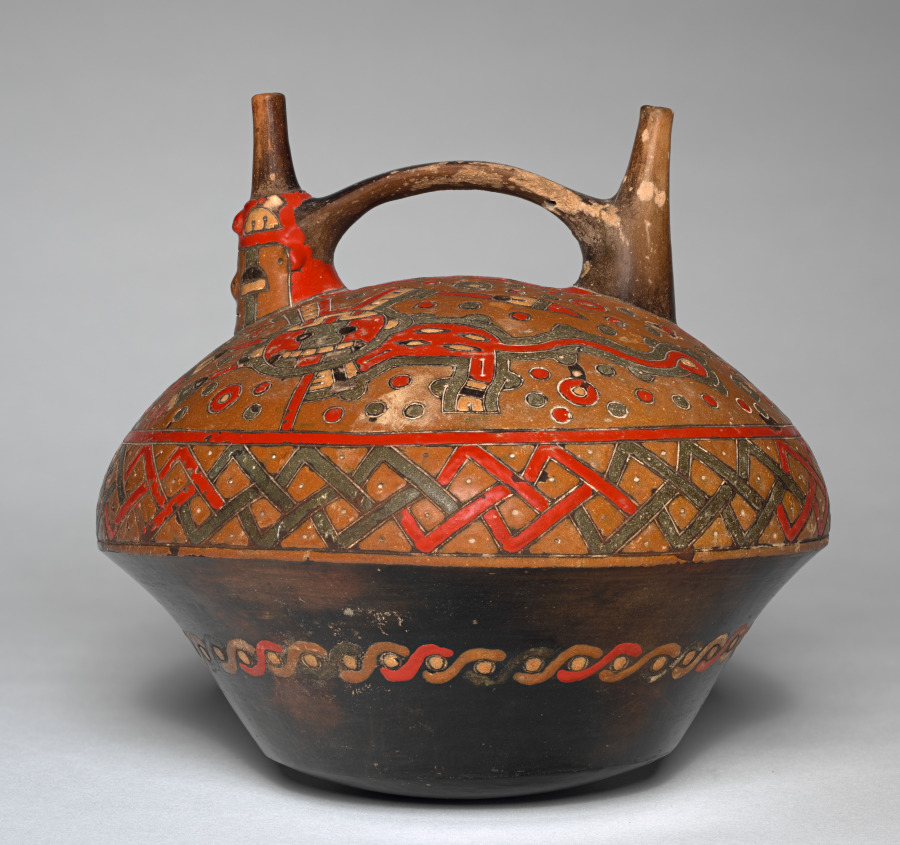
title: Double-spouted Vessel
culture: Andes, south coast, Paracas people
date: 750–1 BCE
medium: Ceramic, resin-based paint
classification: Ceramic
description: The Paracas style, the earliest of Peru’s south coast, focuses on geometric abstraction and polychromy, the latter achieved in ceramics with resin-based paints applied after the vessel was fired. This example is embellished with two monkey- or feline-like creatures whose curvilinearity indicates the vessel was made in the late stages of the Paracas sequence.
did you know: A face with upturned eyes on one spout gives this vessel a specific orientation.